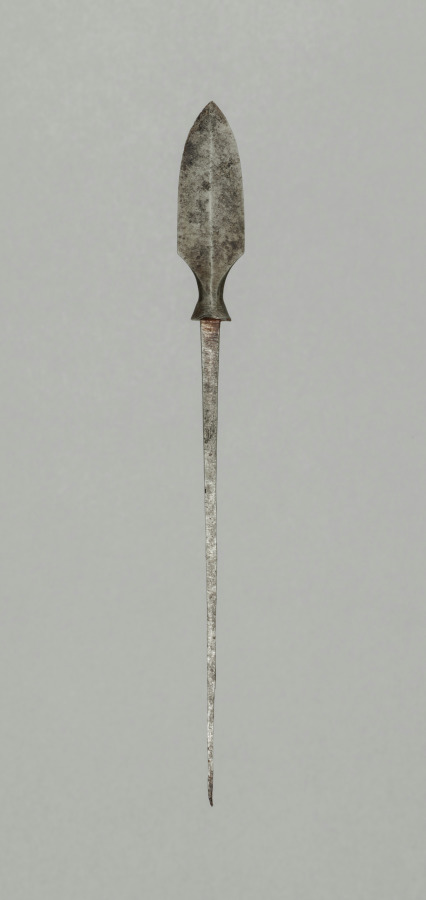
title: Arrow Point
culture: Japan, Edo period (1615–1868)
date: 1700s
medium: steel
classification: Arms and Armor